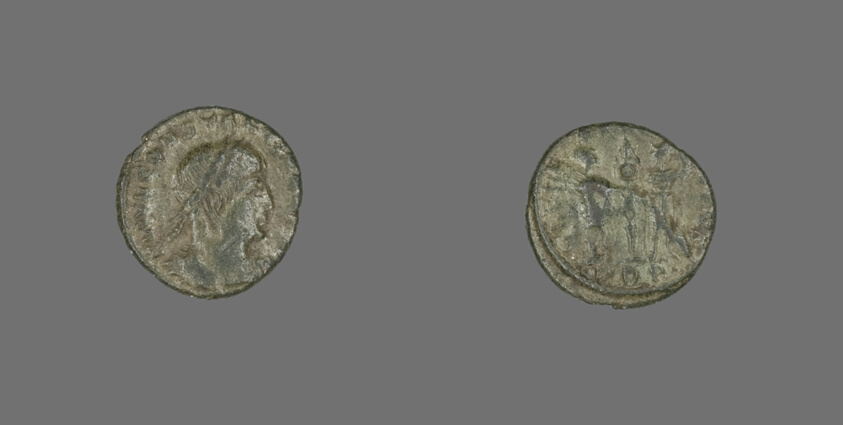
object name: Coin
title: Coin Portraying Emperor Constantius II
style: roman (ancient, style or period), ancient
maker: Roman, minted in Trier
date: 335-337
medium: Bronze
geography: Roman Empire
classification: coin; ancient art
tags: portrait